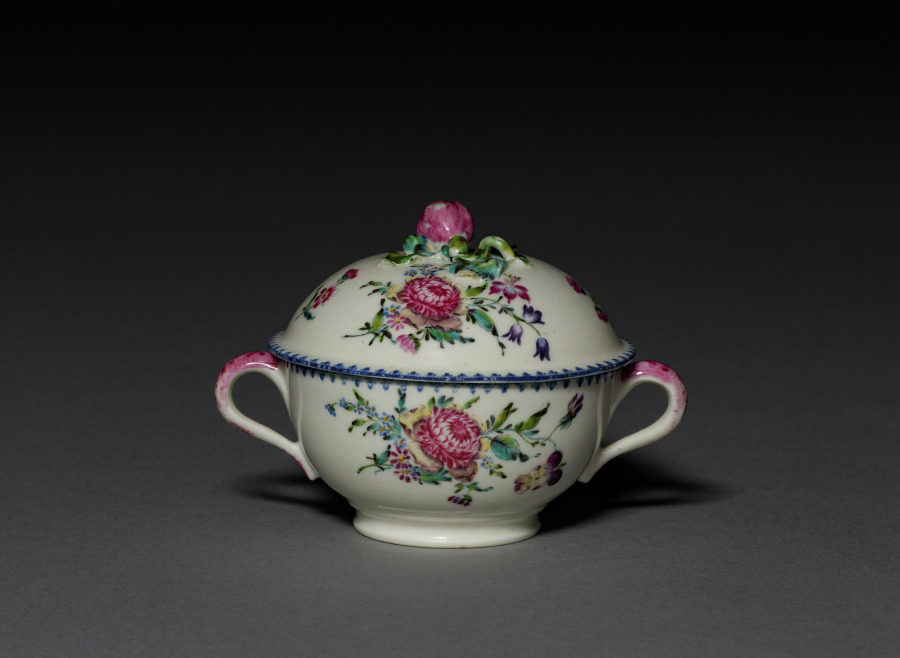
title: Covered Bowl (Écuelle)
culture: France, Mennecy, 18th century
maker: Mennecy Factory (French)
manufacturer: Mennecy- Villeroy Factory (French)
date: c. 1755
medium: soft-paste porcelain with enamel decoration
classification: Ceramic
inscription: [Incised]: "D,V"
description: Members of the 18th-century French social elite would participate in a lengthy ritual of washing and dressing called the toilette. Along with hair and make-up, this process, which bordered on performance, would also leave time to eat. Small, two handled bowls like this one were used for broths or soups consumed by an individual in the bedroom or boudoir.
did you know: The name éceulle originates from the oak, or esculus, that was used to make early medieval bowls of a similar shape.